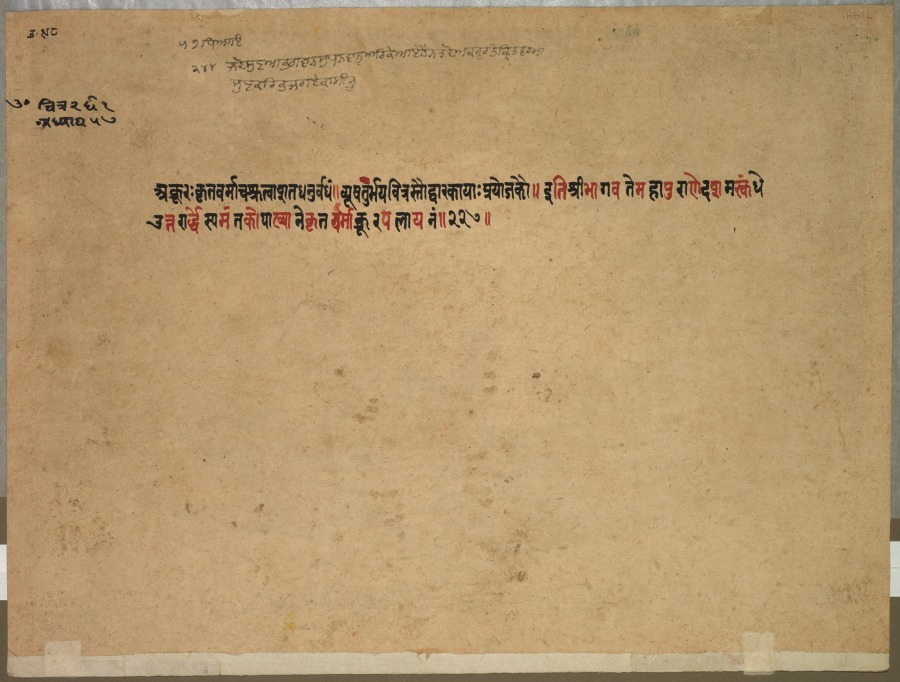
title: Akrura and Kritavarma flee Dvaraka, page from the "Large Basohli Bhagavata Purana"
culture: Northern India, Pahari kingdoms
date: c. 1760–65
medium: Gum tempera and ink on paper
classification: Painting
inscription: akrūraḥ kṛtavarmā ca śkatvā śatadhanurvadhaṃ || gūṣatur bhayavitrastau dvārakāyāḥ ||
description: Two warriors flee from Krishna’s capital city on horseback in a scene that takes place late in the life of Krishna. They were responsible for the death of Krishna’s father-in-law, King Satrajit. Furthermore, one of them is carrying the infamous Syamantaka jewel, stolen from King Satrajit. This magical jewel, a gift from the sun god, has the power to produce 170 pounds of gold every day. They are afraid of Krishna’s wrath.